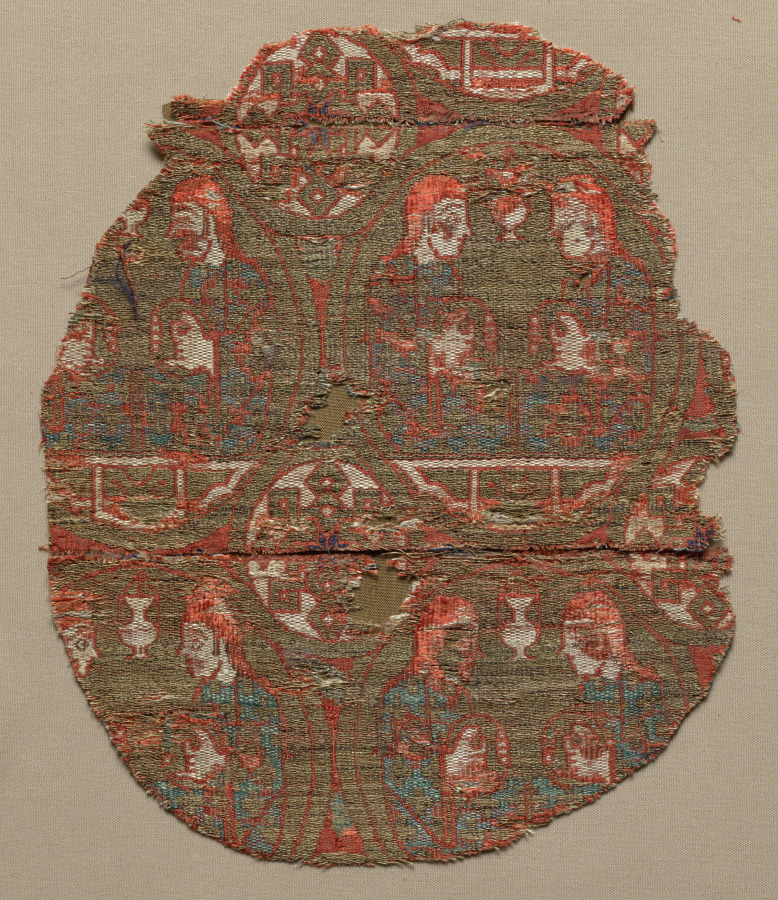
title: Fragment with musicians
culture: Spain, probably Almeria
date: 1200s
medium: Silk and gold thread: lampas weave with areas of double cloth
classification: Textile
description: The repeating pattern features female musicians playing tambourines. They wear long blue and blue-green robes in alternate rows. A lamp hangs between them, suggesting an evening setting. Traces of their black hair peek out from under red headdresses. This textile, along with several other fragments, was found within the pages of a Christian manuscript in the Cathedral of Vich, near Barcelona in northeastern Spain.